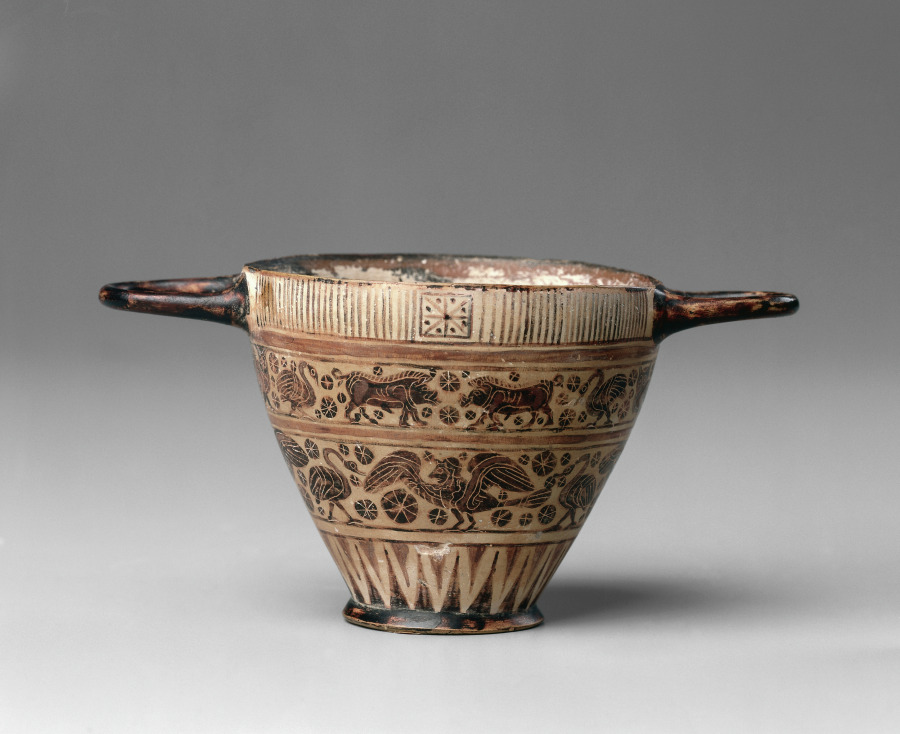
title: Black-Figure Kotyle (Drinking Cup): Animal Friezes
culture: Greek, Corinthian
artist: attributed to Shoe Lane Painter (Greek, early-mid 1900s)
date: 600s–500s BCE, with modern painting and incision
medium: ceramic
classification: Ceramic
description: This vessel began as an authentic drinking cup in the ancient Greek city of Corinth. Originally bearing no figural decoration, it was given new handles and animal friezes in a style recalling that of ancient Corinthian artists. The modern decorator was prolific enough that scholars have recognized their hand, coining the name “Shoe Lane Painter” after a street in Athens where many such vases were sold.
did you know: Although the body of this cup is ancient, its handles and figural decoration are modern.